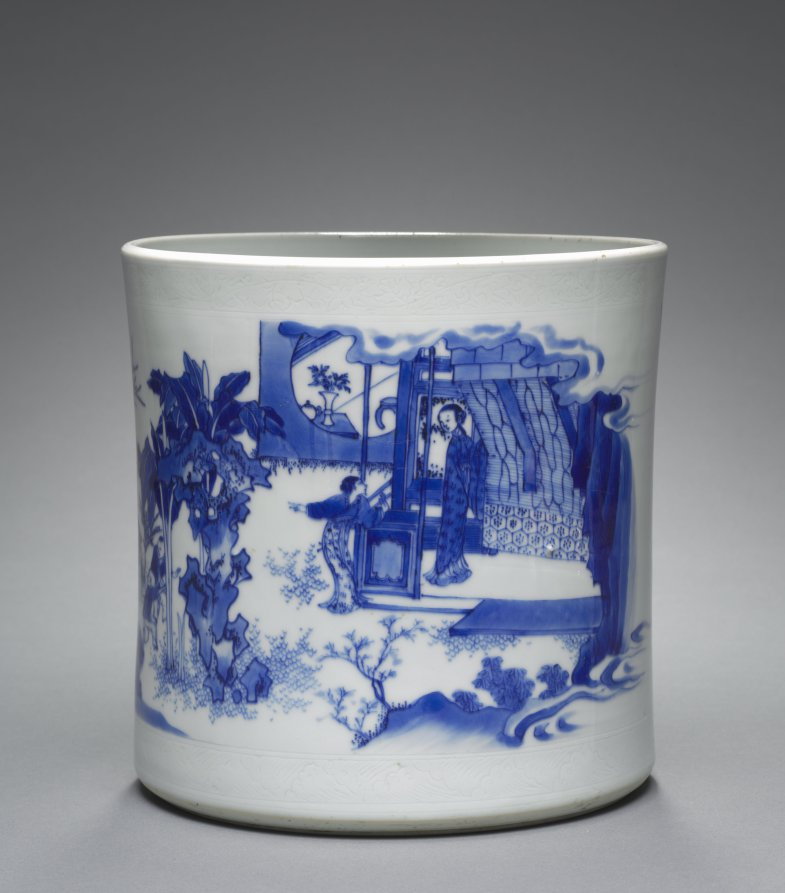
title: Brush Pot with Episode from Life on Sima Guang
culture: China, Jiangxi Province, Jingdezhen, Qing dynasty, Shunzhi period (1644–61)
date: 1628–61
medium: porcelain with underglaze blue decoration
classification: Ceramic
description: Painted in a continuous scene around the cylindrical body is an episode from a folktale about Sima Guang (1019-86), a renowned Northern Song statesman and scholar who exercised quick thinking in his childhood when he broke a ceramic vat filled with water to rescue a drowning playmate